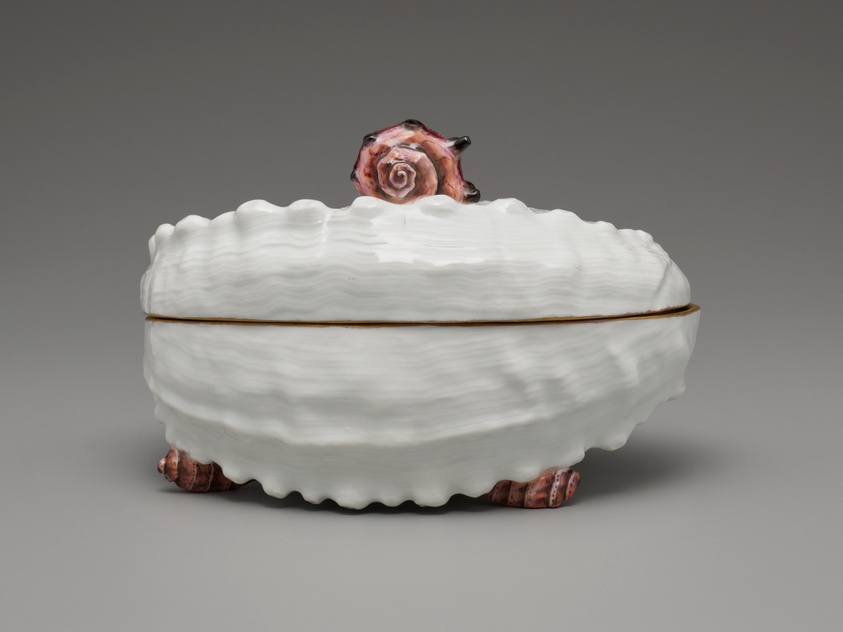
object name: Ceramics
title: Sweetmeat Box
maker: Meissen Porcelain Factory (German, founded 1710); Modeled by J. F. Eberlein (German, 1696-1749)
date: 1746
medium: Hard-paste porcelain, polychrome enamels, and gilt metal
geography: Meissen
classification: porcelain; box; ceramics; enamel; european decorative arts; metal; vessel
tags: shells, seas